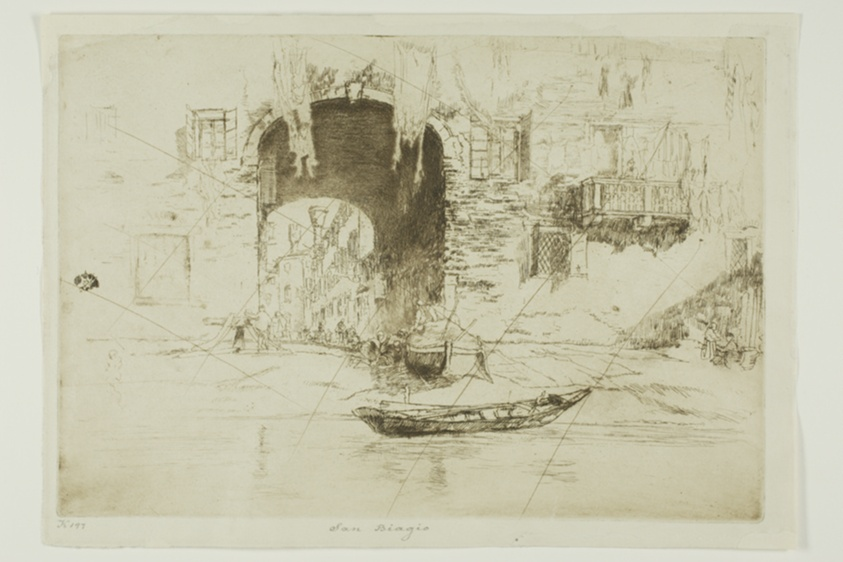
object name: Print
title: San Biagio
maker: James McNeill Whistler (American, 1834-1903)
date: 1880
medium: Etching and drypoint with foul biting, with drypoint cancellation, in brown ink on ivory laid paper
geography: United States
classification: etching; print; prints and drawing; foul biting; drypoint; paper